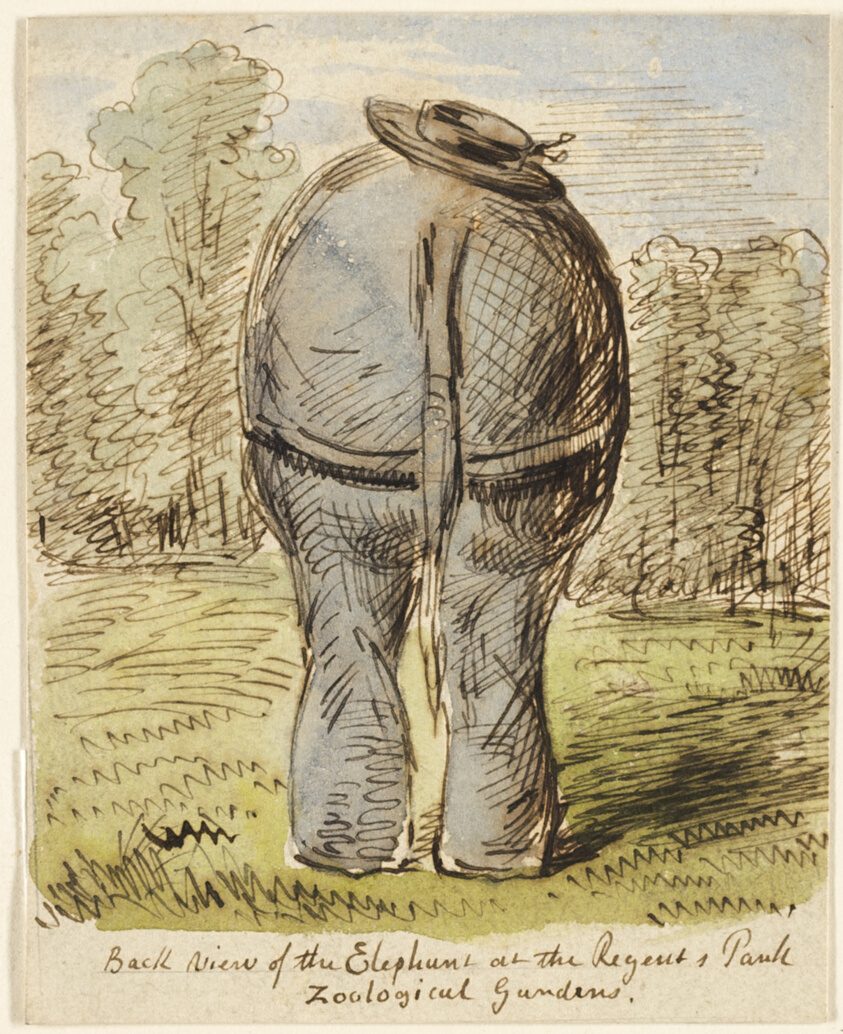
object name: Drawing and Watercolor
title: Back View of the Elephant at the Regent's Park Zoological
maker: John Leech (English, 1817-1864)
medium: Watercolor and pen and brown ink, over graphite, on cream wove paper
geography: England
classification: watercolor; drawings (visual works); prints and drawing